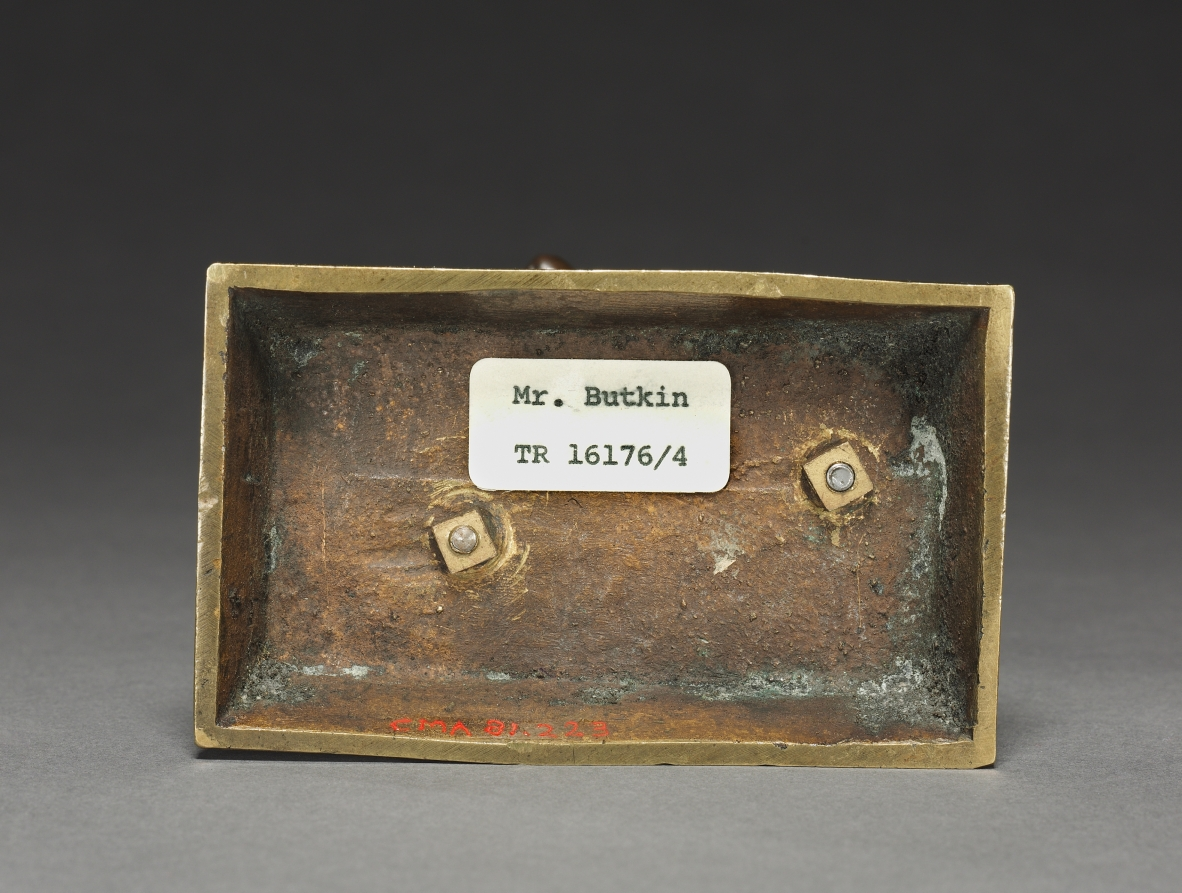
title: Hercules Carrying the Erymanthean Boar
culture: France, 19th century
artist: Antoine-Louis Barye (French, 1796–1875)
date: c. 1820–1830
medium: bronze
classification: Sculpture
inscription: signed on base: "BARYE."